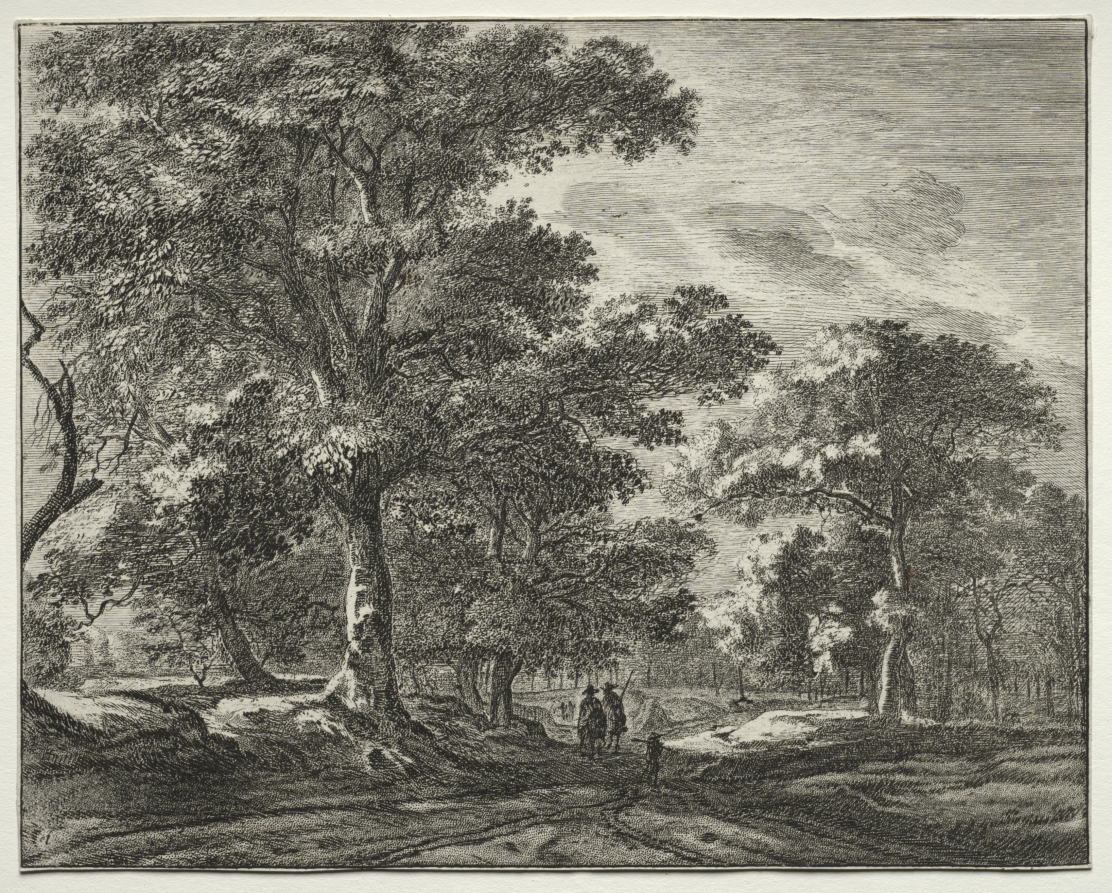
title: Six views in the Wood of the Hague: Plate 1, Two Men Preceded by a Hunter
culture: Netherlands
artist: Roelant Roghman (Dutch, 1627–1692)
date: 1640–52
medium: etching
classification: Print